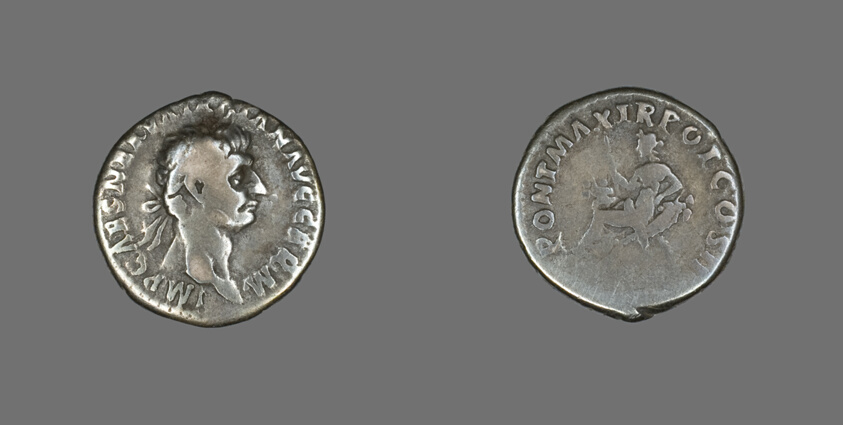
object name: Coin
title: Denarius (Coin) Portraying Emperor Trajan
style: roman (ancient, style or period)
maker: Roman, minted in Rome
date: 98-99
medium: Silver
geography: Roman Empire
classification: coin; ancient art